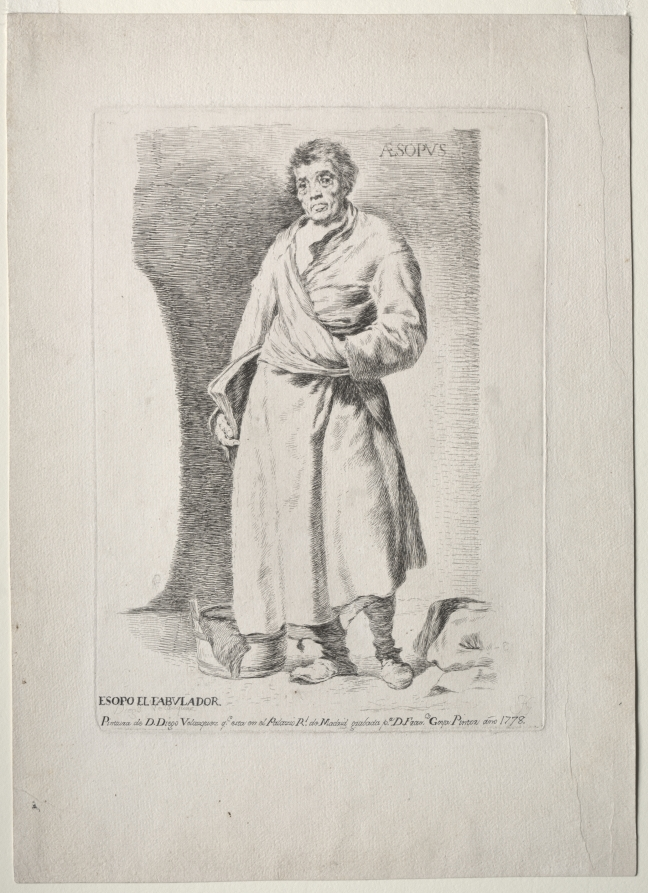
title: Aesop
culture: Spain, late 18th-early 19th century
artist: Francisco de Goya (Spanish, 1746–1828)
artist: after Diego Velázquez (Spanish, 1599–1660)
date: 1778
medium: etching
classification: Print